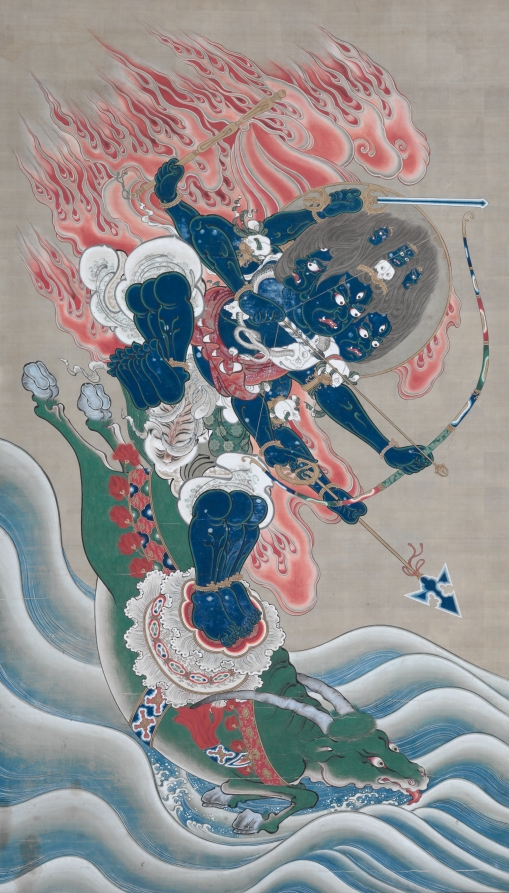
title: Wisdom King of Great Awe-inspiring Power (Daiitoku Myōō)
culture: Japan, Edo period (1615–1868)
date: mid-1800s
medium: Hanging scroll; ink, color, and gold on silk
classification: Painting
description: In Esoteric Buddhism, there is one Buddha at the center of the universe, and four additional Buddhas, each of whom occupies one of the four cardinal directions. These Buddhas also manifest themselves in fierce forms called Kings of Brightness (myōō), or Wisdom Kings. Daiitoku is an avatar of the Buddha Amida and manages the west.